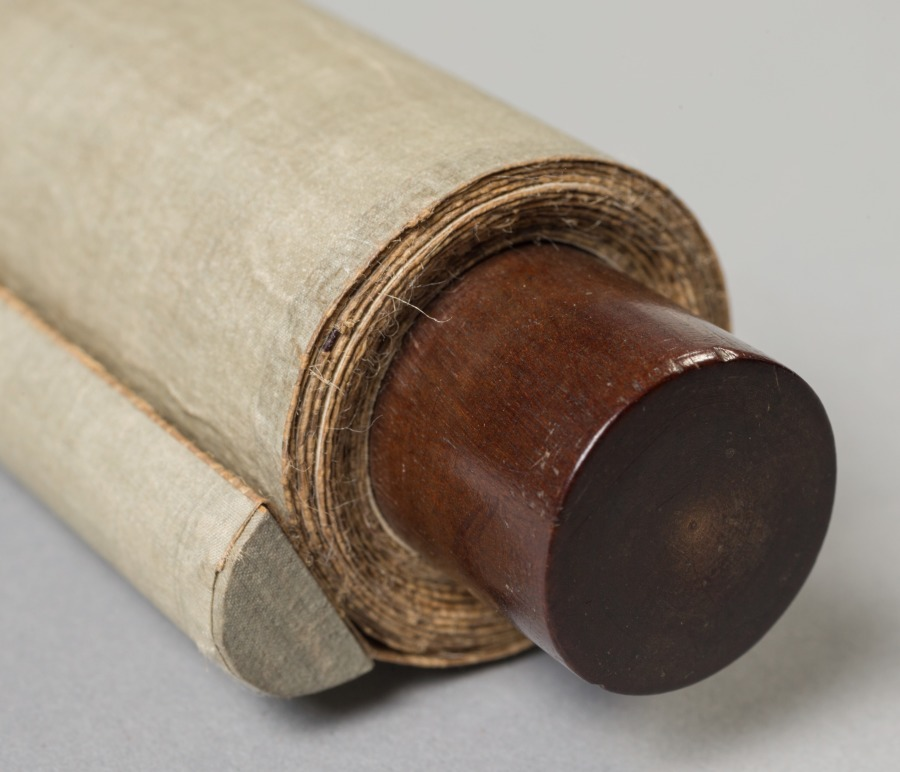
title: Woman as an Itinerant Monk: Onna Komuso (Otsu-e)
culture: Japan, Edo period (1615–1868)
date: late 1600s-early 1700s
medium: hanging scroll; ink and color on paper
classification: Painting